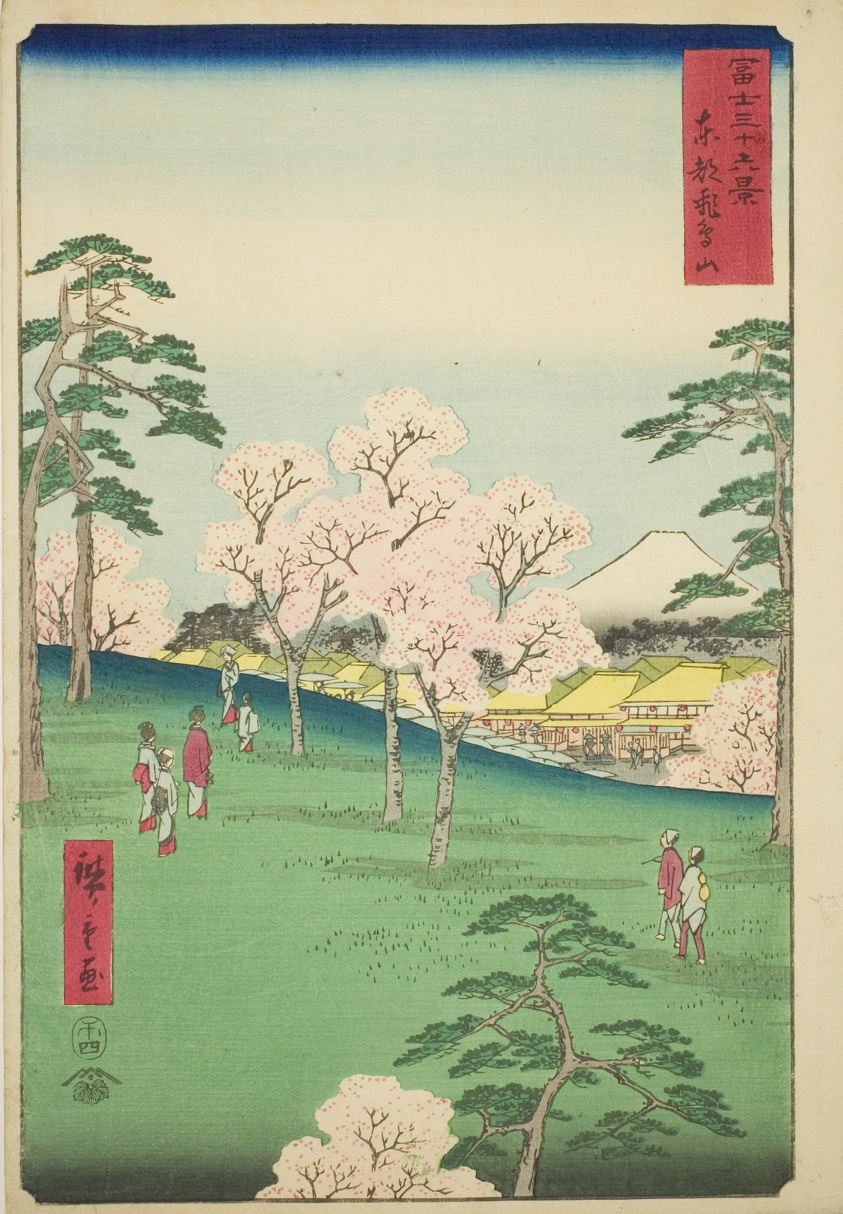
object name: Print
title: Asuka Hill in the Eastern Capital (Toto Asukayama), from the series "Thirty-six Views of Mount Fuji (Fuji sanjurokkei)"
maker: Utagawa Hiroshige 歌川 広重; Japanese, 1797-1858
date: 1858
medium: Color woodblock print; oban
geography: Japan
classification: print; asian art